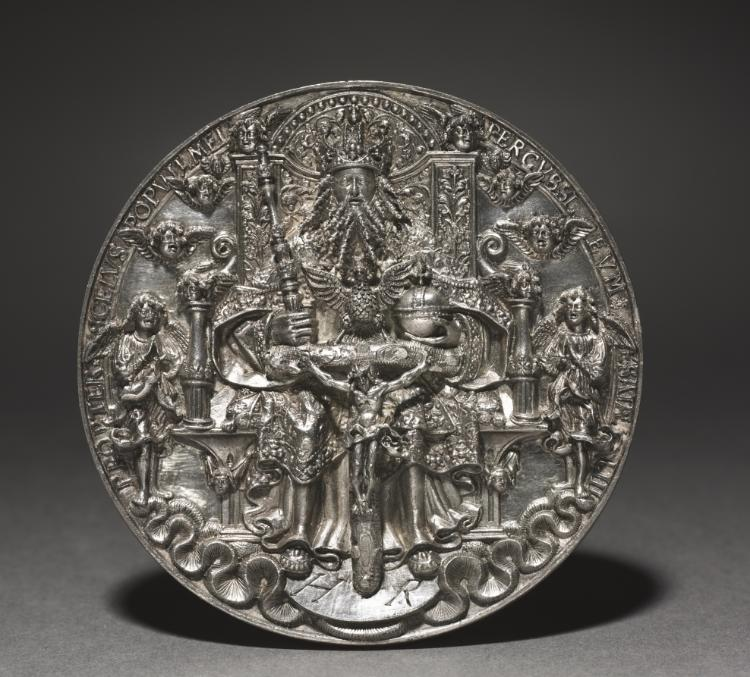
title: The Trinity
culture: Germany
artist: Hans R. Reinhart (German, c. 1500–1581)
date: 1544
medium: silver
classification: Sculpture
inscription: below the cross and on the reverse are incised the letters: H. R.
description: Commissioned by Duke Moritz of Saxony, this medal depicts the Trinity in the form of the Throne of Grace. God the Father holds the cross on which Christ has been crucified, expressing God’s acceptance of Christ’s sacrifice, with the Holy Spirit between them in the form of a dove.